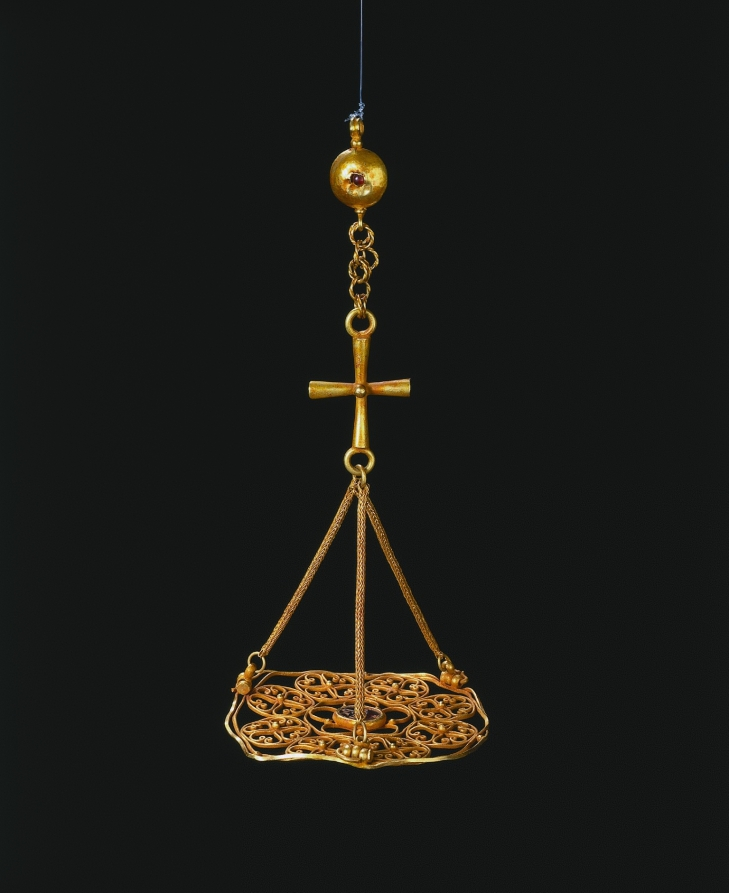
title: Votive Polycandelon (Lamp Holder)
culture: Byzantium, Byzantine period, 6th century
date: 500s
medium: gold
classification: Metalwork